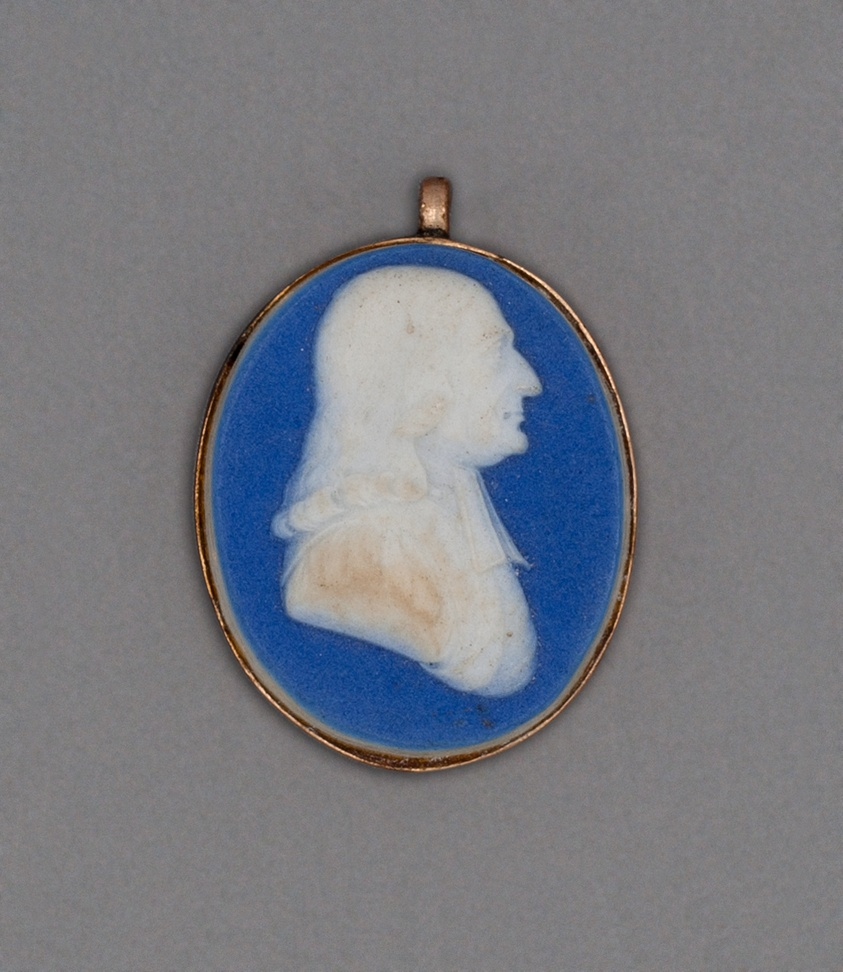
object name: Ceramics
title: Cameo with Portrait of John Wesley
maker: Wedgwood Manufactory (England, founded 1759)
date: Late 18th century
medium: Stoneware (jasperware)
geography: Burslem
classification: cameo (sculpture); sculpture; stoneware; european decorative arts; ceramics